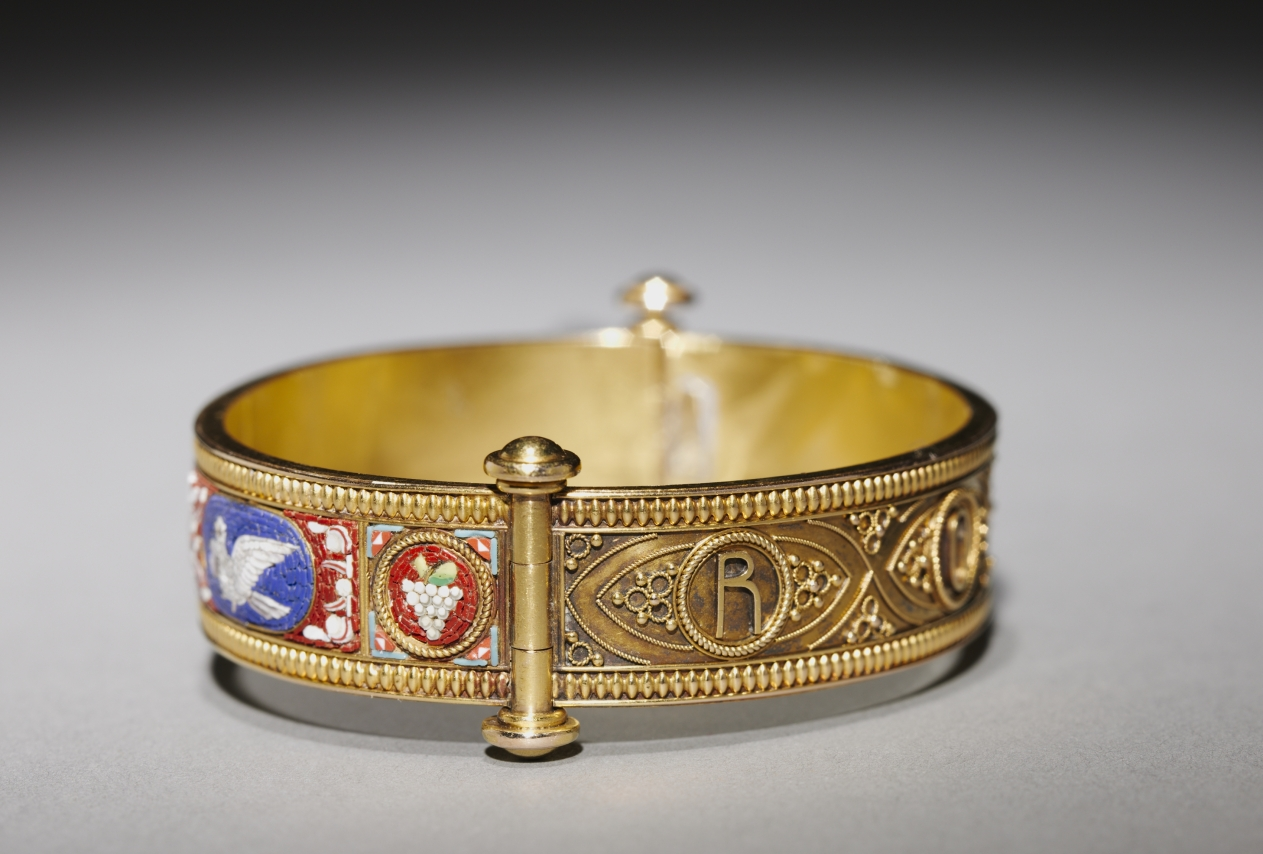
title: Bangle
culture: Italy, Rome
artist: attributed to Fortunato Pio Castellani Firm (Italian)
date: c. 1860–70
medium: gold, glass mosaic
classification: Jewelry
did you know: This bracelet is decorated with tiny tesserae or pieces of glass that create a micro-mosaic.